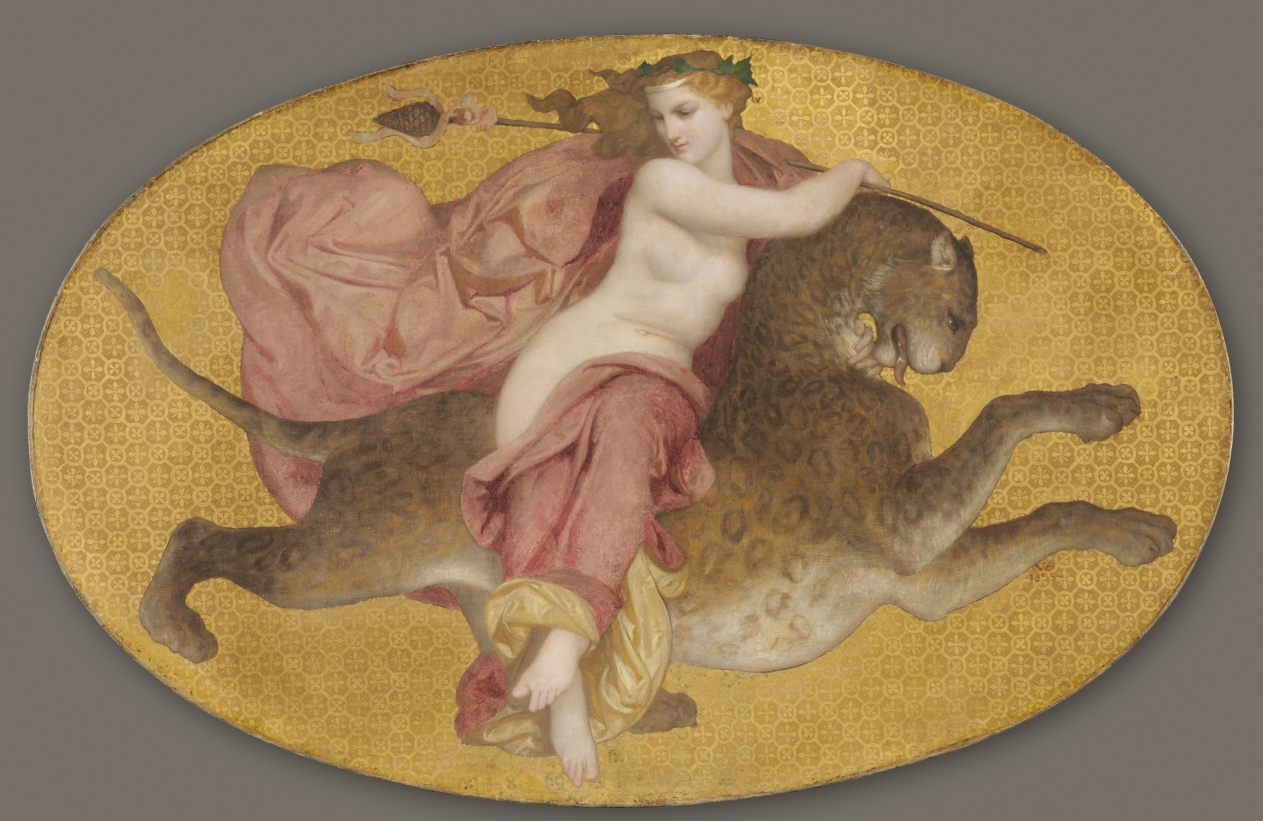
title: Bacchante on a Panther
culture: France, 19th century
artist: William Adolphe Bouguereau (French, 1825–1905)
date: 1855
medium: oil on fabric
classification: Painting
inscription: Signed in red-brown paint lower right: wb [in monogram] / 1855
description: Part of a series of six paintings that decorated Etienne Bartholony's house in Paris, these paintings emulate ancient Roman designs. Crisp, cut out forms are set against a gold background painted in imitation of mosaic. Arion was an ancient Greek poet who escaped death by riding away on the back of a sea creature who had been attracted by the poet's song. In the companion picture, a bacchante—a female worshipper of the wine god Bacchus—rides on a panther, the god's symbolic animal. These works were shown at the 1857 Paris Salon exhibition.